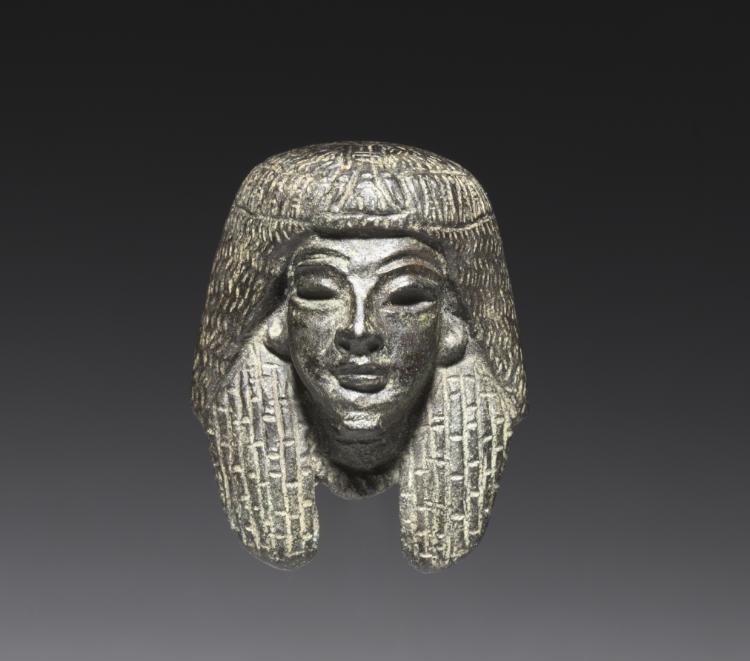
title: Bronze mount from a "Shawabty Bundle": Head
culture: Egypt, Thebes, Wadi Qubbanet el-Qirud, New Kingdom (1540–1069 BCE), Dynasties 18–19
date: c. 1336–1256 BCE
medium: head; bronze face, black copper wig, with traces of gilding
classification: Funerary Equipment